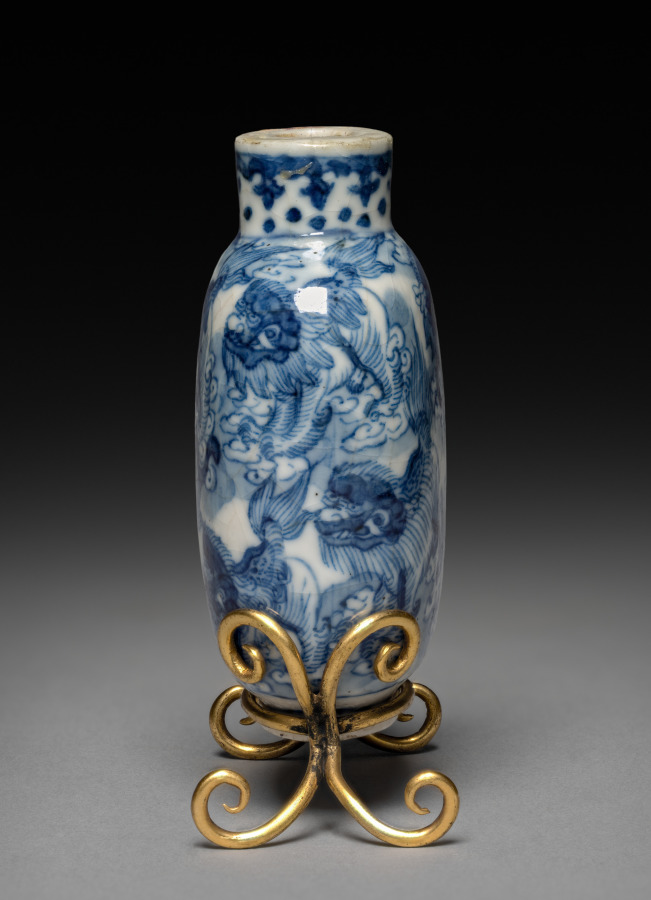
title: Flattened Ovoid Snuff Bottle with Stopper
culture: China, Jiangxi province, Jingdezhen kilns, Ming dynasty (1368-1644), Wanli reign (1572-1620)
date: 1573–1620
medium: porcelain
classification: Ceramic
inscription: 萬曆年製